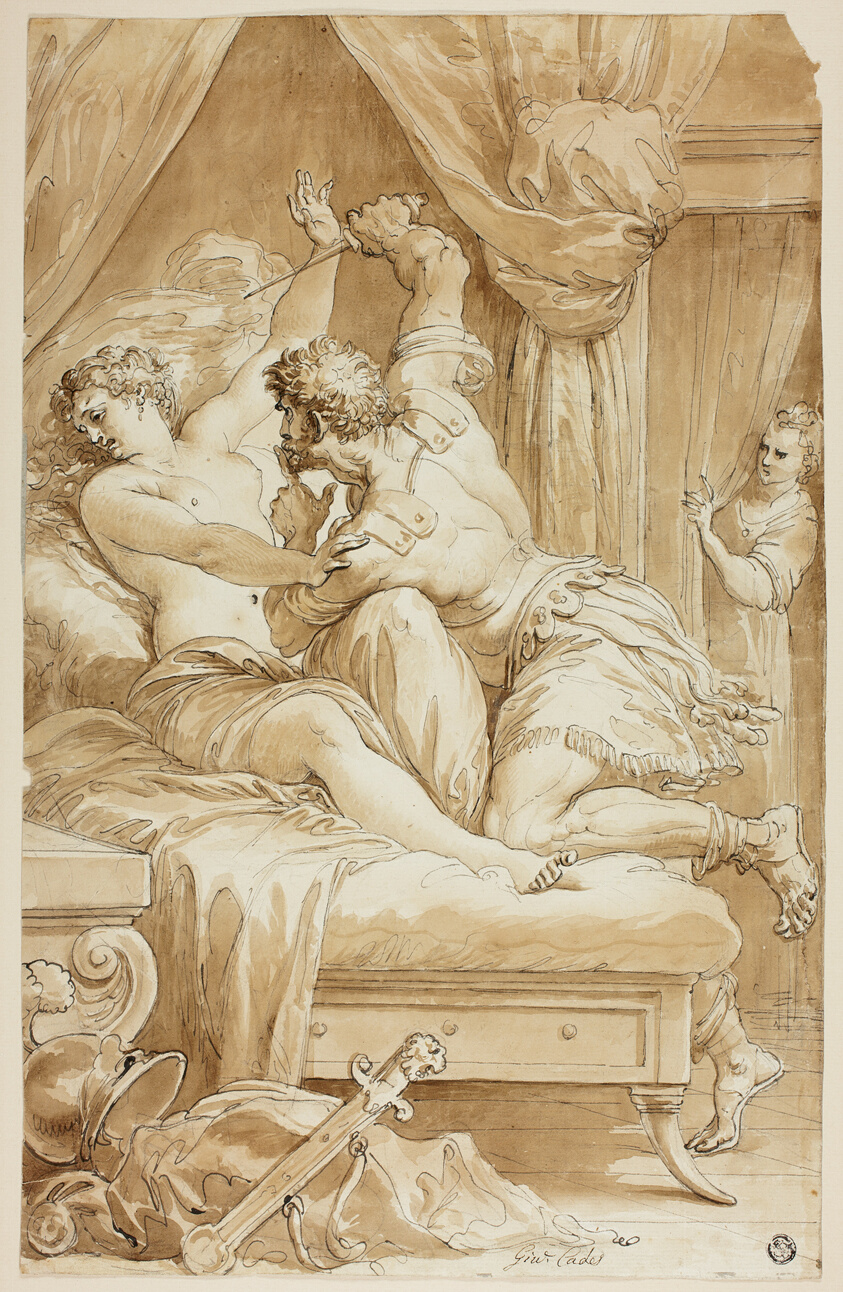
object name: Drawing and Watercolor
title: Rape of Lucretia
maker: Giuseppe Cades (Italian, 1750-1799)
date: 1795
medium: Pen and black ink with brush and brown wash, over black chalk, on ivory laid paper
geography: Italy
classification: drawings (visual works); prints and drawing